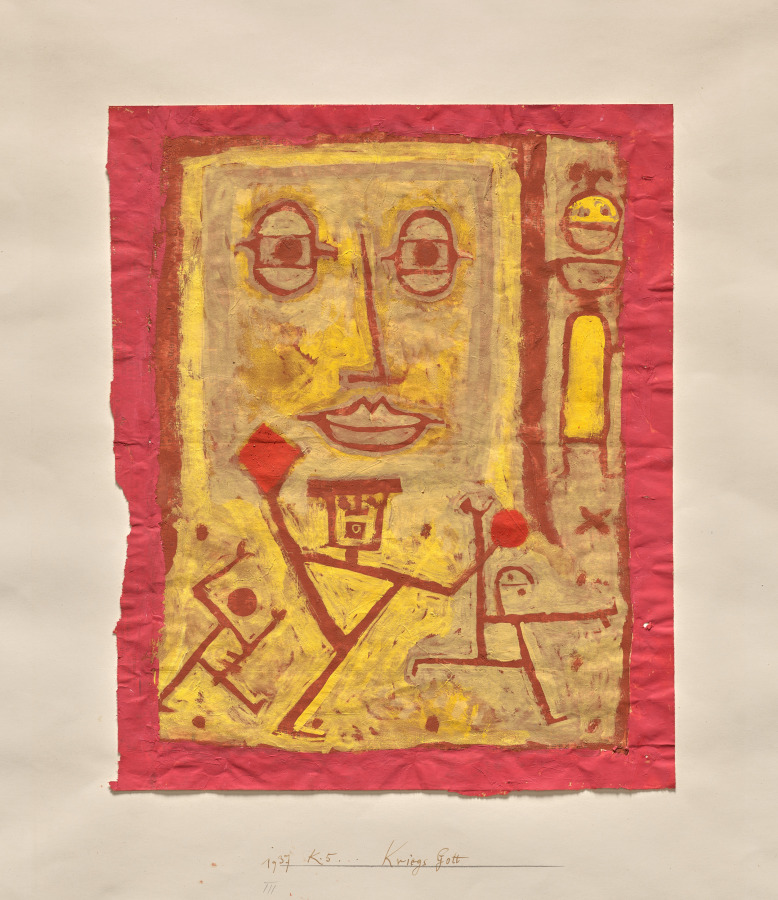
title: God of War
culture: Germany, 20th century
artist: Paul Klee (German, 1879–1940)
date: 1937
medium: Gouache and tempera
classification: Drawing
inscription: signed, upper left, in paint: Klee; secondary support, by artist, lower center, in brown ink: 1937 K. 5. Kriegs Gott ["37 K. 5. Kriegs Gott" underlined in graphite]; lower center, in graphite: III; verso of secondary support, upper left, in graphite: Nos 39 31 / 35 x 29 [all circled]; upper left, on separately applied label: [upper portion cropped] / 1937 [inscribed in blue ink] No [printed in black ink] 0843 [stamped in blue ink] / Paul Klee / Dieu de la Guerre / 35 x 29 [last three lines inscribed in blue ink] / Photo No [printed in black ink]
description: This drawing belongs to a series of large format works with bold colors, thick painterly lines, and pictograph formations that Paul Klee created late in his career. The period during which they were made was marked by anxiety for the artist, as political turmoil grew in Europe during the 1930s. To suggest this experience, Klee painted on a sheet of newspaper, allowing the printed text to intermingle with his own sign-like marks. The article visible here, for example, discusses the Spanish civil war. The figures that dominate the work more subtly suggest this crisis, including a large face with heavy eyelids and an enigmatic smile depicted in layers of yellow paint and several dancing or running figures in the foreground delineated by areas left unpainted.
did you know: Shortly before this drawing was made, Paul Klee was exiled from Germany to his native Switzerland due to the political turmoil that led to World War II.